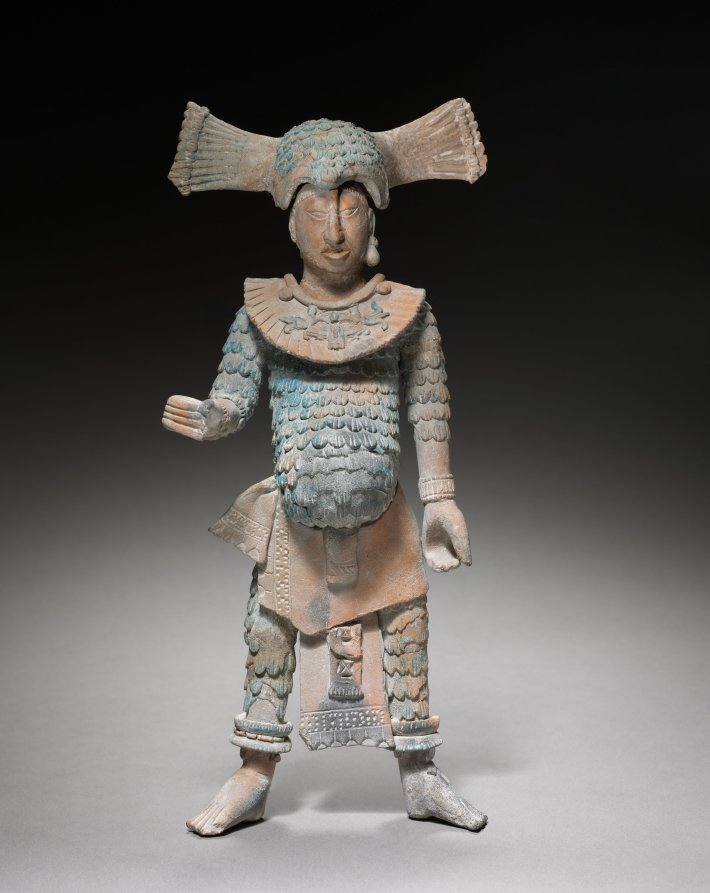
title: Warrior Figurine with Removable Headdress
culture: Mexico, Yucatán, Jaina Island region, Campeche, Maya style (250-900)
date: 600–900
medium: earthenware with pigment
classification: Sculpture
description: The major offerings placed in the Maya graves of Jaina Island were ceramic figurines, some of Mesoamerica's finest, that depict deities and humans in a variety of roles. This warrior, his headdress removable, once probably held weapons and wears either quilted cotton armor or the feathered uniform of a military order. We don't know why such figures are often pot-bellied.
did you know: Maya blue pigment was made by combining clay with indigo in a complex technique developed around the ninth century.